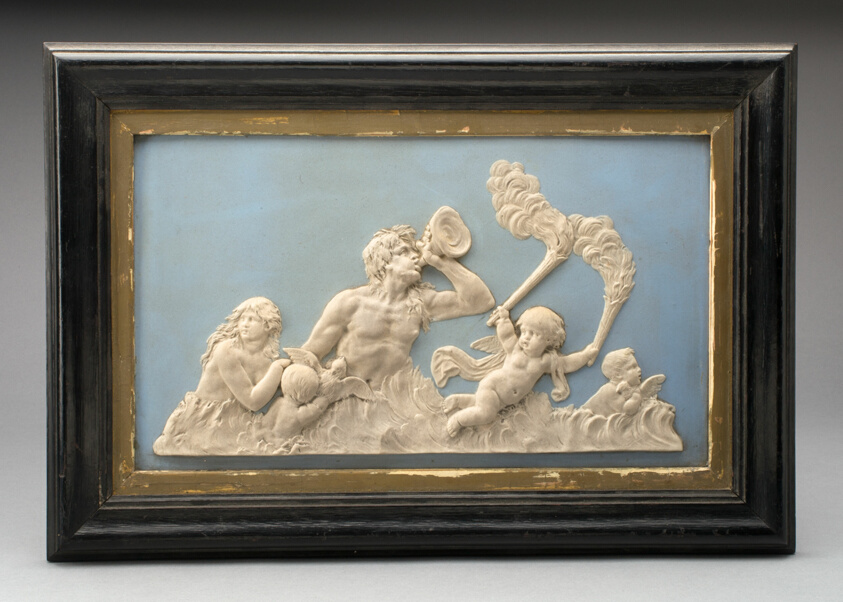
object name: Ceramics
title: Plaque with Triton and Nereids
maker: Wedgwood Manufactory (England, founded 1759)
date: Late 18th century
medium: Stoneware (jasperware)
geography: Burslem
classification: sculpture; ceramics; stoneware; european decorative arts